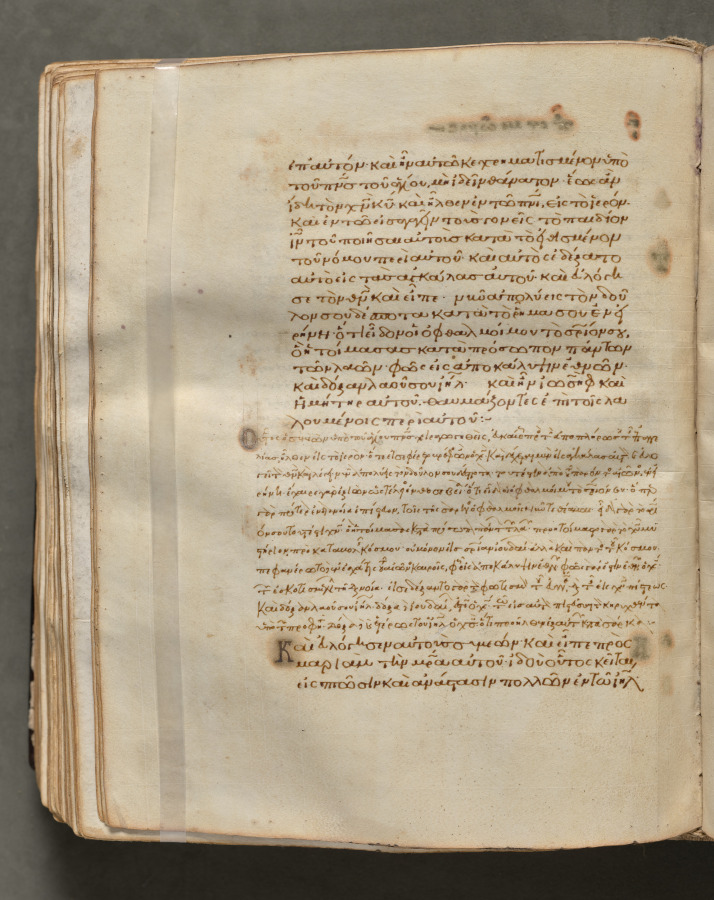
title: Text, folio 210 (verso), from a Gospel Book with Commentaries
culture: Byzantium, Constantinople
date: c. 1000–1100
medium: ink, tempera, and gold on vellum; leather binding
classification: Bound Volume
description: Each of the four gospels in this book opens on a page with brilliantly illuminated borders depicting the author of the text as well as birds-principally peacocks, symbols of the immortality of the soul-and fountains, representing the fountain of life and the salvation of the soul. This volume consists of 428 leaves with texts in Greek. Its level of sophistication suggests that it was probably written and decorated in a monastery in Constantinople.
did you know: Gospel Books were carried in procession through Byzantine churches.